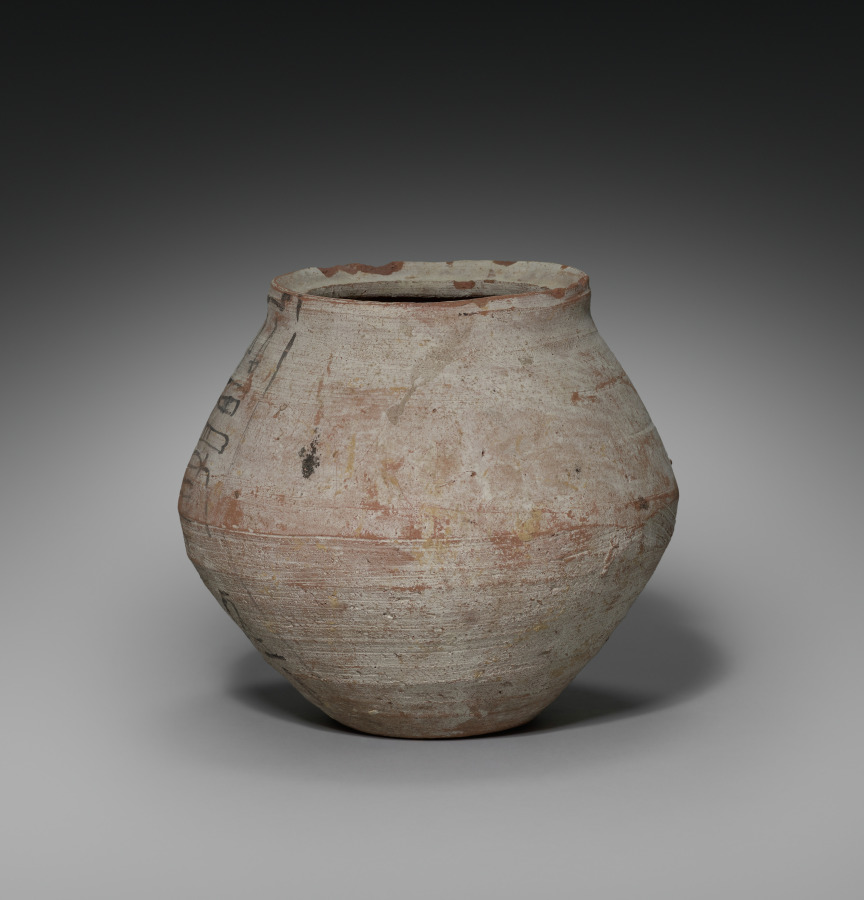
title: Shawabty Jar with Lid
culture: Egypt, New Kingdom (1540–1069 BCE), Dynasties 19–20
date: 1295–1069 BCE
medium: Nile silt ware; lid of limestone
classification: Funerary Equipment